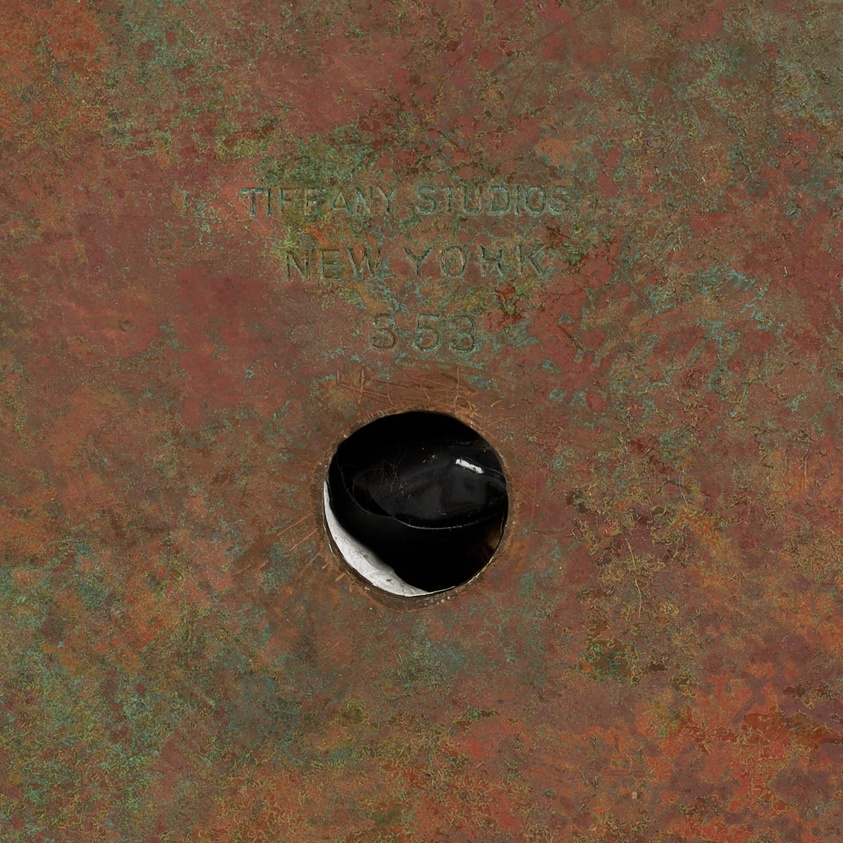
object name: Furnishings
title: Lamp with “Heavy Ribs” Shade and “Bat” Base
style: Arts and Crafts Movement, 20th Century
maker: Tiffany Studios (American, 1902–32); Corona, New York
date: c. 1905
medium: Favrile glass, leaded glass, and bronze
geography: Corona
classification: lamp (lighting device); american decorative arts; decorative arts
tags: bats, mosaic, spiders, spiderwebs